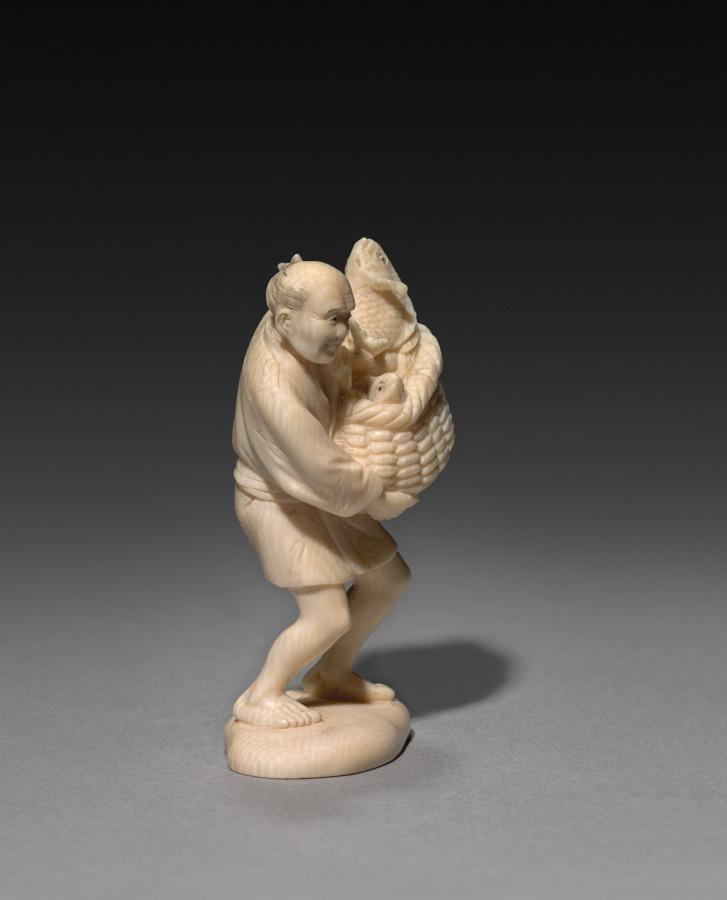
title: Man Carrying a Basket of Fish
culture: Japan, Meiji period (1868–1912)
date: early 1900s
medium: ivory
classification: Ivory